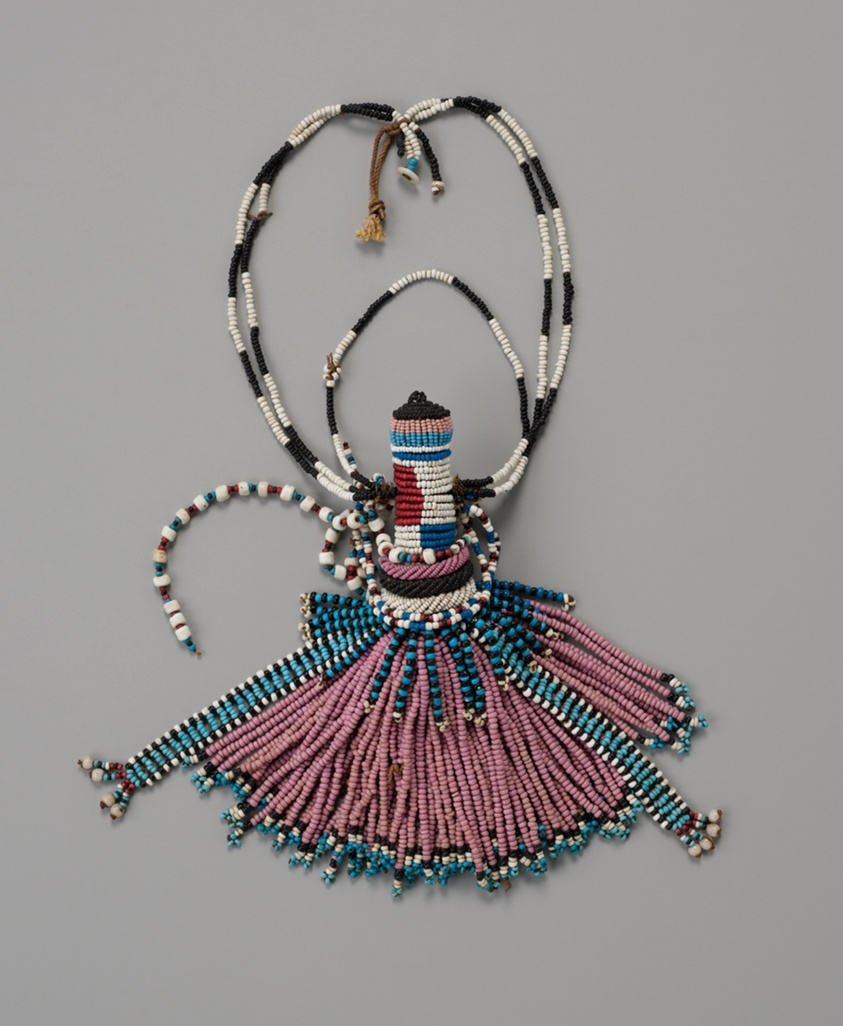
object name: Decorative Arts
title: Fertility Figure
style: sotho, Eastern and Southern Africa, Arts of Africa, african Art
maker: Southern Sotho; Lesotho or South Africa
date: 19th century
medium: Glass beads, cloth, and fibre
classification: figure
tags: fertility